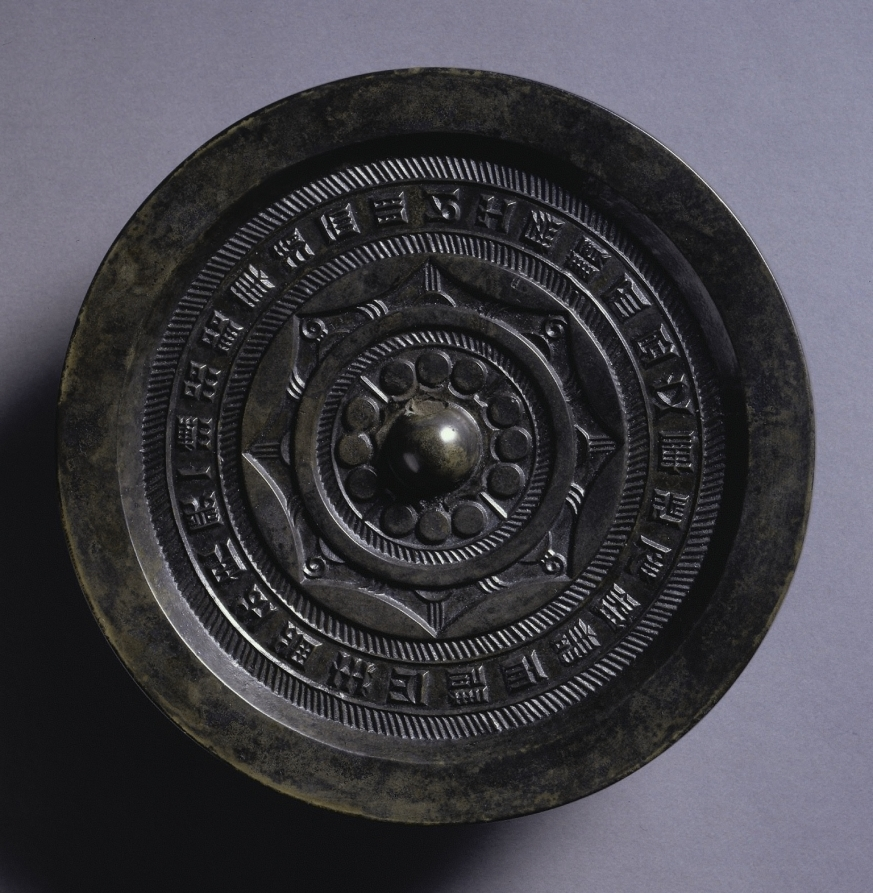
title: Mirror with Concentric Circles and Linked Arcs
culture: China, Western Han dynasty (206 BCE–8 CE)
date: 100–1 BCE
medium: bronze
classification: Metalwork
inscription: 涑治銅華清而明。 以之為鏡宜文章。 延年益壽而辟不產（祥）。 與天毋極。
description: Inscription: Refine the copper to be pure and bright. Make it into a mirror to receive rightful decor. May it extend your life and remove misfortunes! [You are] coeval with the heaven above.